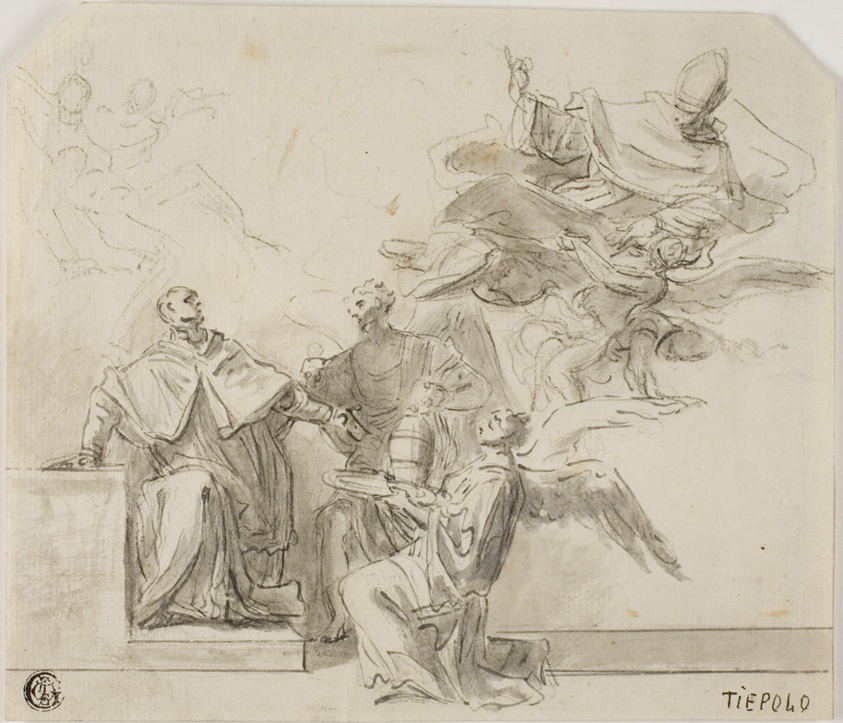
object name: Drawing and Watercolor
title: Saint called to Papal Chair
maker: Attributed to Domenico Mondo (Italian, 1732-1806); or Francesco Solimena (Italian, 1657-1747); or Giovanni Battista Tiepolo (Italian, 1696-1770)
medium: Pen and black ink, with brush and gray wash, with black chalk, on cream laid paper, partially laid down on tan wove paper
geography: Italy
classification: ink or chalk wash; pen and ink drawings; paper; drawings (visual works); prints and drawing